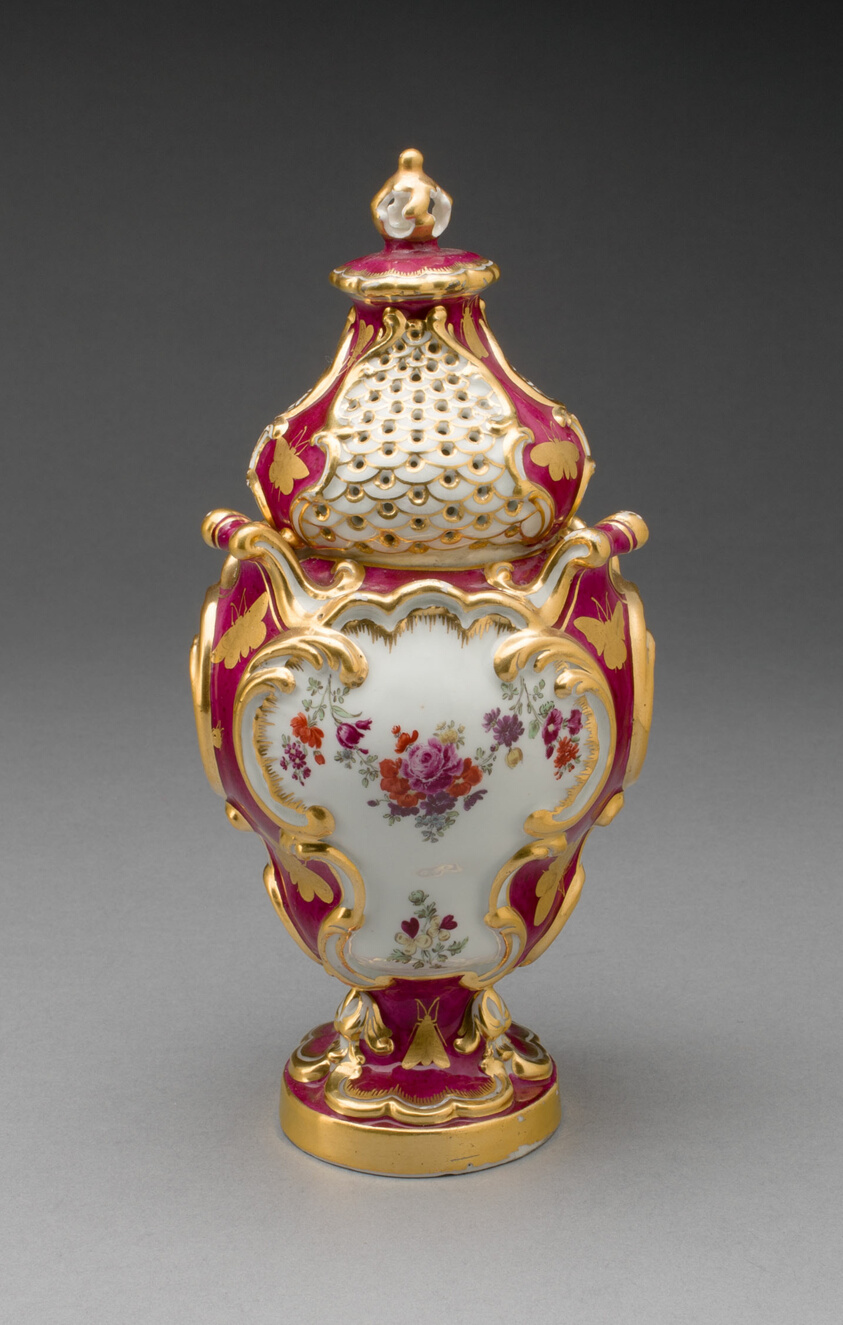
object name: Ceramics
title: Potpourri Vase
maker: Chelsea Porcelain Manufactory; London, England, c. 1745-1784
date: c. 1765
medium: Soft-paste porcelain, polychrome enamels and gilding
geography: Chelsea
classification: vase; european decorative arts; vessel; porcelain; ceramics